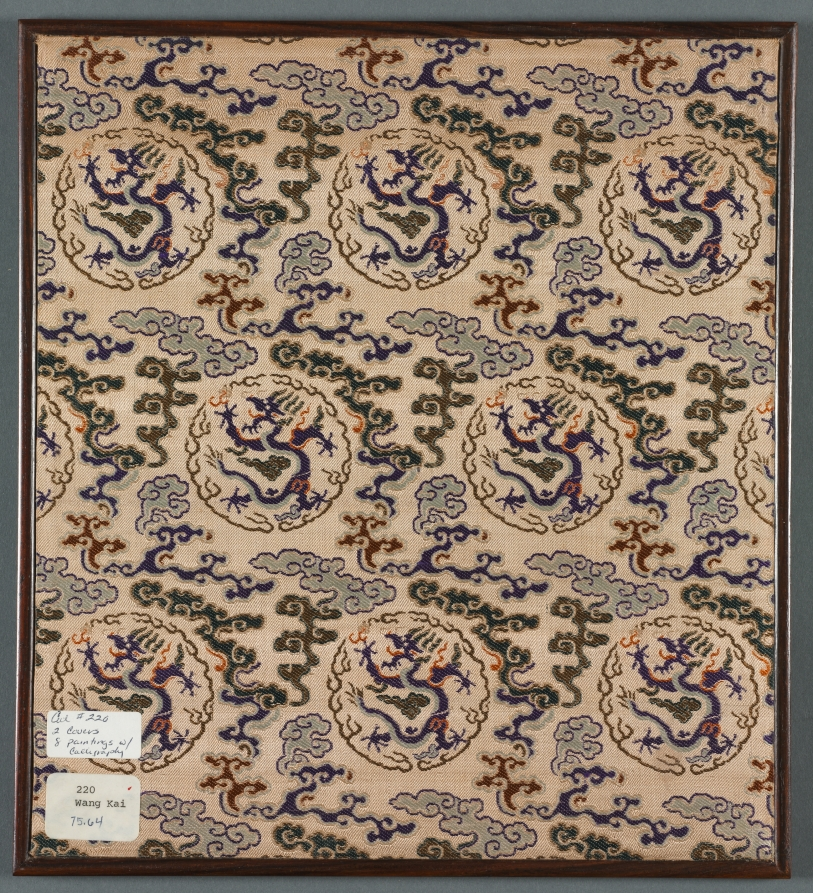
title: Album of Landscapes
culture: China, Qing dynasty (1644–1911)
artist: Wang Gai (Chinese, active c. 1677–1705)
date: 1677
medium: Album of eight leaves; ink or ink and light color on paper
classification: Painting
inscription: Artist's inscription, signature, and seal on leaf 4: In imitation of [T'ang] Wang Hsia's use of ink. Wang Gai of Hsiu-shui [seal] Gai; Artist's poem, signature and seal on leaf 7; Artist's poem, signature, and 2 seals on leaf 8. 8 colophons and 24 additional seals: 1 colophon and 2 seals of Shih Jun-chang (1618-1683); 1 colophon and 3 seals of Wang Shih-chen (1634-1711); 1 colophon and 2 seals of Li Lai-t'ai (dates unknown); 1 colophon and 3 seals of Mi Han-wen (1661 'chin-shih'); 1 colophon and 3 seals of Tai Wang-chin (17th c.); 2 colophons and 6 seals of Tai Wang-lun (1655 'chin-shih'); 1 colophon and 2 seals of Wang Wan (1624-1690); 1 seal of Chang Yin-huan (1837-1900); 2 seals unidentified. Artist's inscription, signature, and seal on leaf E: In imitation of [T'ang] Wang Hsia's use of ink. Wang Kai of Hsiu-shui [seal] Kai. Artist's poem, signature, and seal on leaf G: At an empty window sucking on a brush, the autumn water nearby, Green are the rushes, and bamboo reach to the sky. For those who love hibiscus, river moonlight is best; In this tiny shelter I keep company with sleeping egrets. Wang Kai [seal] Wang yin Kai. Artist's poem, signature, and 2 seals on leaf H: The waters of the Hsün-yang River flow around the town [Chiu-chiang in Chianghsi Province]; Yü Liang [Western Chin Dynasty general and statesman] once made a night excursion here. The air was fresh and cool - it must have been the eighth month; That noble gathering would still be known a thousand years thereafter. In the tantalizing ways we feast there is no difference, past or present, Lofty and pre-eminent talent still overflows in the exchange of verses, Tall and large pavilions all share in good writing. Joy winging through the air is no less than that in the Southern Tower. [The Southern Tower, in Nanch'ang, Hupei Province, was where Yü Liang spent an evening with friends and contemporaries exchanging poetry and ideas.] In the mid-autumn of the ting-ssu year [1677], these paintings and comments are presented to the venerable MengWeng, leader of the literary circle, for criticism. Wang Kai of Hsiu-shui [seals] Wang yin Kai; An-chieh. 8 colophons and 24 additional seals: 1 colophon and 2 seals of Shih Jun-chang (1618-1683); 1 colophon and 3 seals of Wang Shih-chen (1634-1711); 1 colophon and 2 seals of Li Lai-t'ai (dates unknown); 1 colophon and 3 seals of Mi Han-wen (1661 chin-shih); 1 colophon and 3 seals of Tai Wang-chin (17th c.); 2 colophons and 6 seals of Tai Wang-lun (1655 chin-shih); 1 colophon and 2 seals of Wang Wan (1624-1690); 1 seal of Chang Ym-huan (1837-1900); 2 seals unidentified. A. Poem by Shih Jun-chang: Trees enmeshed in clouds darken the river ferry; So grand a scene could only belong to the season of late spring. Looking upon the Five Lakes, fishermen are few, You don't know who the oarsman is. Random comment for the venerable Meng Chih-weng to correct. Shih Jun-chang. B. Poem by Wang Shih-chen: A valley stream winds around a hermit's home, Over dark bamboo and yellow reeds leans one corner of the house. Watching the wake of a fishing boat off somewhere, The ripples in the water are like wild geese nesting in the sand. Inscribed for Meng Weng by his junior, Wang Shih-chen. C. Poem by Li Lai-t'ai: A small bridge merged with clouds crosses the distant water, A few rosy clouds and autumn colors trim the clear river. I stand alone at leisure in empty mists; The mountains' verdant sides and misty peaks face the small window. Inscribed for venerable Mr. Meng Weng, Li Lai-t'ao. D. Poem by Mi Han-wen: Coming and going time after time, The front pavilion rests upon a great river. Distant sails, the spring waters broad, A tall temple, the afternoon sun strong. Beneath the shadow of a butterfly, red peonies, Amidst the chatter of birds, green vines. Unable yet to return to the old mountains, In vain I hum the "Picking ling-chih" song. Written for Meng Lao, Mi Han-wen. [The last two lines refer to the Four Old Recluses of Mount Shang who lived during the Ch'in Dynasty [221-206 BC], and the song they sang about picking ling-chih, the mushroom-like growth thought to produce immortality.] E. Poem by Tai Wang-chin: Who picks up his unrestrained brush to write down misty peaks? To gaze at mountains from an empty house is a pleasure inexhaustible. I even wish I were physically within a painting. Where floating clouds are not depicted, but only a vast sea of waves. Written for the comments of Mr. Meng Weng, your junior associate, Tai Wang-chin. F. Poem by Tai Wang-lun: Splashed ink, dripping wet, cannot be restrained Smartweed flowers are boundless, the water flowing long. The old fisherman moves his oar leisurely back and forth, In ten thousand valleys and a thousand peaks, the air is filled with fall. Written on one of the paintings for the venerable Meng Weng, Tai Wang-lun of Ts'ang-chou. G. Poem by Tai Wang-lun: Precipitous slopes, distant peaks, and trees with forking branches, Set apart are village huts for two or three households. In one of them a recluse expounds from a book on the Tao, Burning incense, alone he sits to chant the Nan-hua [Chuang-tzu]. Written on a second painting for the venerable Meng Ch'i, Tai Wang-lun of Ts'ang-chou. H. Poem by Wang Wan: Clouds like a landslide cover the boundless sky; Year-round howling, the direction of the wind is ominous. The boom has just been lowered with a hundred feet of sail; Yet you can predict the violent wind from the direction of flying pennon tails. Reed blossoms fly in disarray, their leaves badly battered; Yangtze porpoises blow upon the waves, producing wild ripples. You people of the land, don't sing about the joys of the trader, Winds and waves like these will make their journey treacherous. Written for venerable Meng Weng, your junior friend from Yao-fen, Wang Wan. trans. HK/LYSL